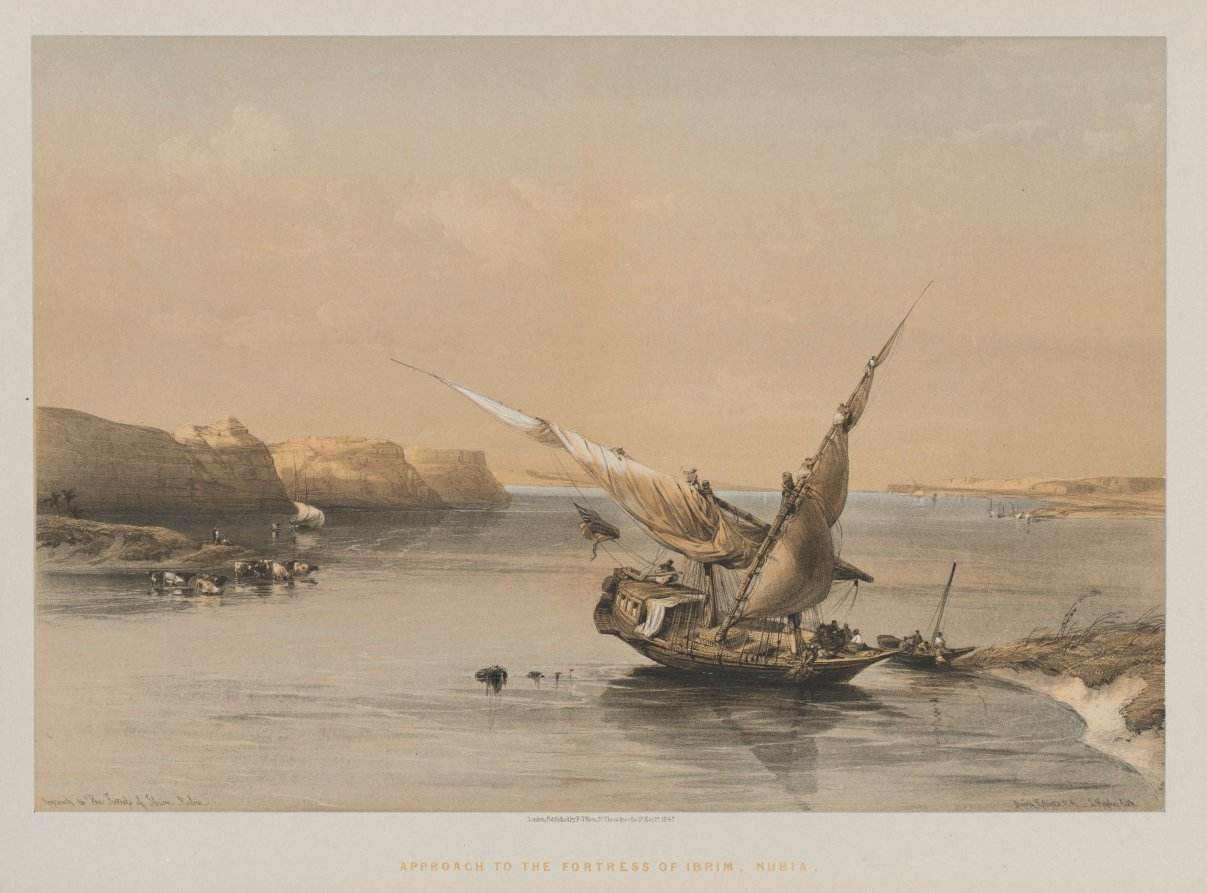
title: Egypt and Nubia, Volume II: Approach to the Fortress of Ibrim, Nubia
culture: England, 19th century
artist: Louis Haghe (British, 1806–1885)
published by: F. G. Moon, 20 Threadneedle Street, London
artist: after David Roberts (Scottish, 1796–1864)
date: 1847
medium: color lithograph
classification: Print